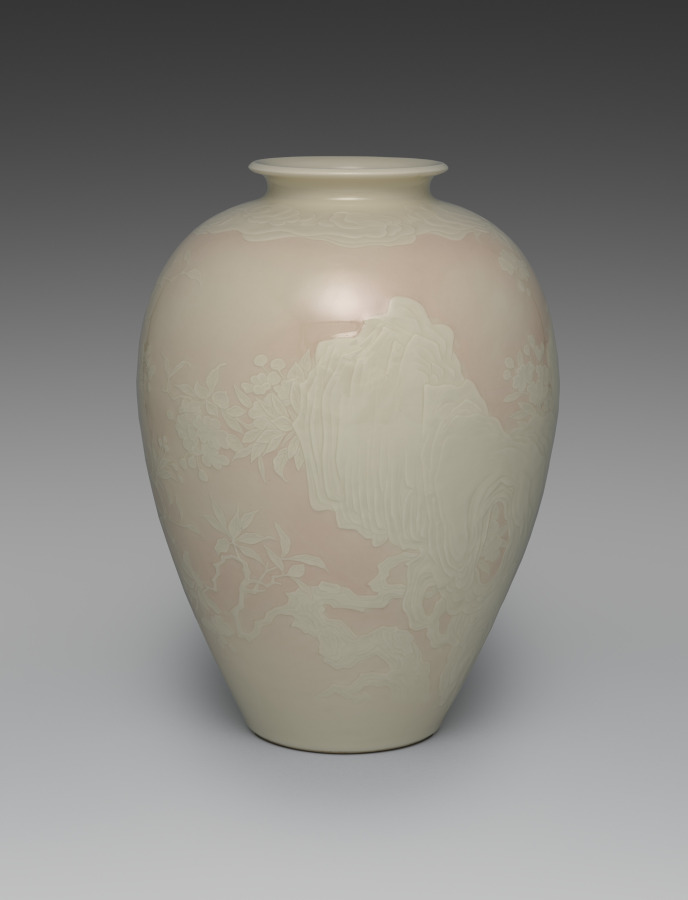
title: Pheasants in Cherry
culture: Japan, Meiji period (1868–1912)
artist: Seifū Yohei III (Japanese, 1851–1914)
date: 1900–1914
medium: Porcelain with molded and carved design, underglaze color, and cream glaze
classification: Ceramic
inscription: 大日本清風造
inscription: 清風製之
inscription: 清風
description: Like the design of Flower Vase with Phoenix in Paulownia (CMA 2022.199), the pair of pheasants in a dramatic landscape setting on this vase was created by adding clay to the surface of the clay body and then molding and carving it. Here, instead of a typical white clay, Yohei III has used an ivory clay. He then added gradated pink around the complex design, which with its multitude of cherry blossoms must have been painstaking to mask with precision. For the birds’ eyes, he added a touch of yellow. He then fired the vase with an allover translucent cream glaze. The resulting kanpakuji piece is one in which an academic subject long favored by painters of the Kano school for screen and sliding door paintings in important buildings, that of impressively sized birds within a scene of precipitous, angled rock faces and twisting trees, is made soft and ethereal while retaining a sense of gravitas.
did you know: The unusually large scale of this piece and the fact that he signed the base “Made by Seifū of Great Japan” also suggest that it was made for public display.